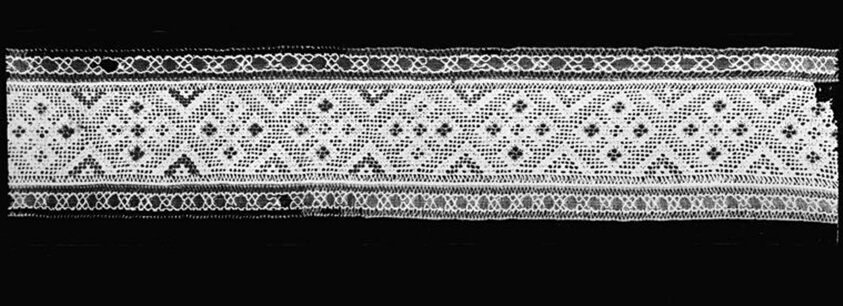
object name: Textile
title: Strip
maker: Russia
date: 19th century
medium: linen, drawnwork embroidery, silk thread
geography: Russia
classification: textile; needlework (visual works)